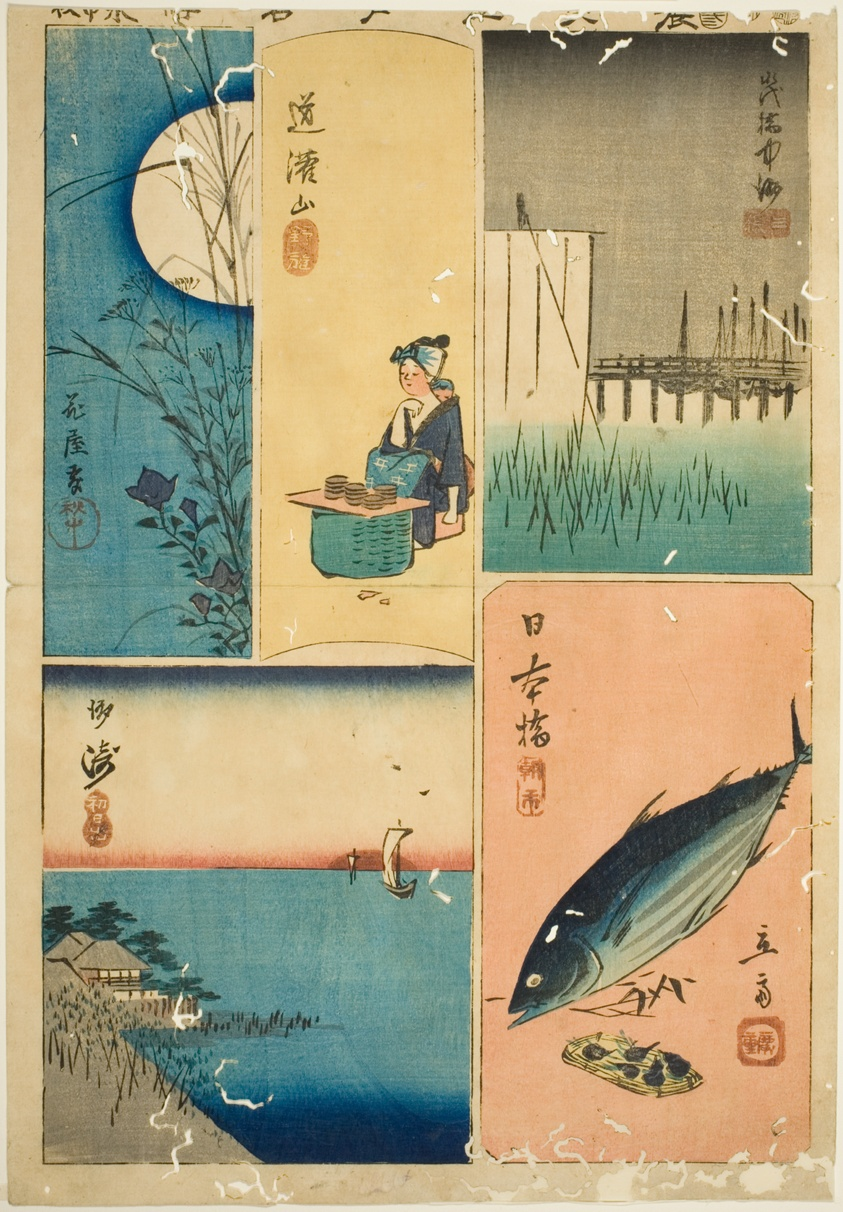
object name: Print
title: Eitai Bridge, Nihon Bridge, Susaki, Flower Garden, and Dokan Hill (Eitaibashi, Nihonbashi, Susaki, Hanayashiki, Dokanyama), from the series "Cutouts of Famous Places in Edo (Harimaze Koto meisho)"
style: Japanese (culture or style)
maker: Utagawa Hiroshige 歌川 広重; Japanese, 1797-1858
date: 1852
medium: Color woodblock print; oban, harimaze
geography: Japan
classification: woodblock print; print; asian art